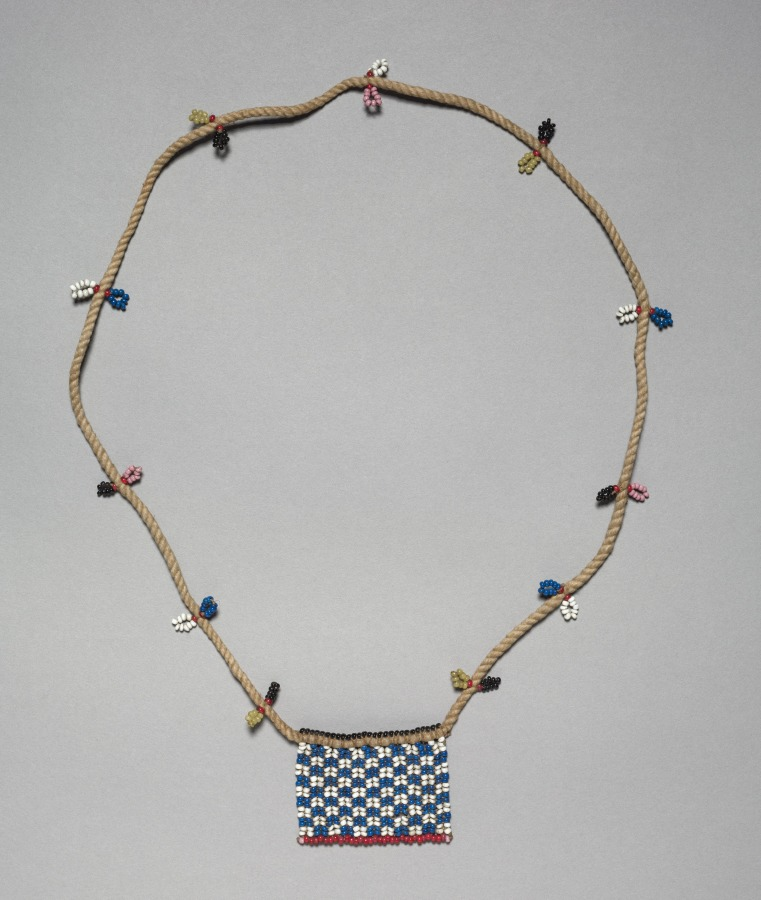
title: Beaded Necklace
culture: Africa, probably Southern Africa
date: early 1900s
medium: Glass beads and cord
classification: Jewelry